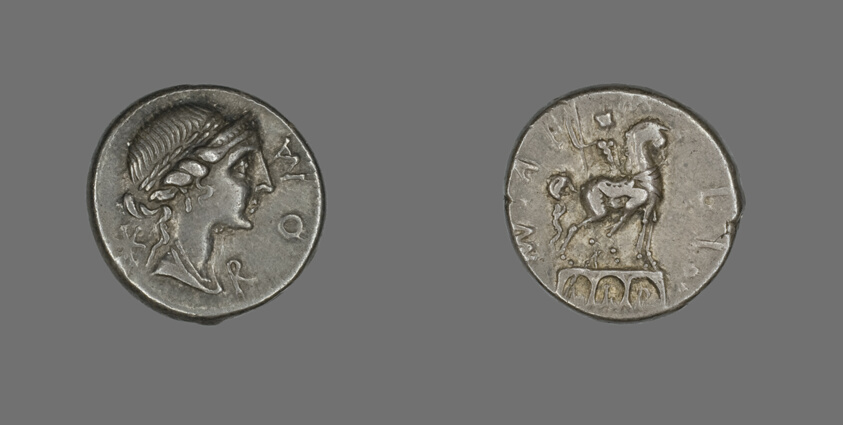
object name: Coin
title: Denarius (Coin) Depicting the Goddess Roma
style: roman (ancient, style or period), ancient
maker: Roman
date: 114-113 BCE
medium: Silver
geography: Roman Empire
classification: coin; ancient art